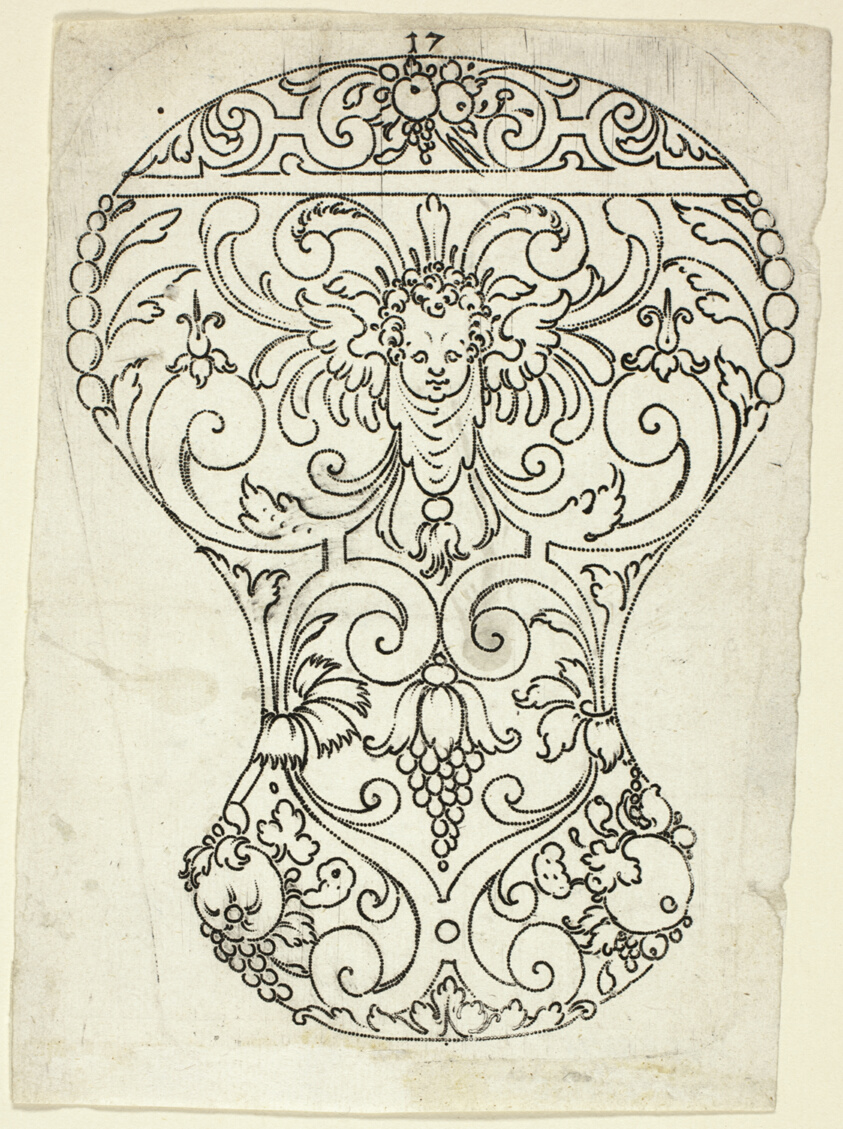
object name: Print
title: Plate 17, from XX Stuck zum (ornamental designs for goblets and beakers)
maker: Master A.P. (German, active early 17th century)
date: 1601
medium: Punch engraving in black on ivory laid paper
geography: Germany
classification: engraving; print; prints and drawing